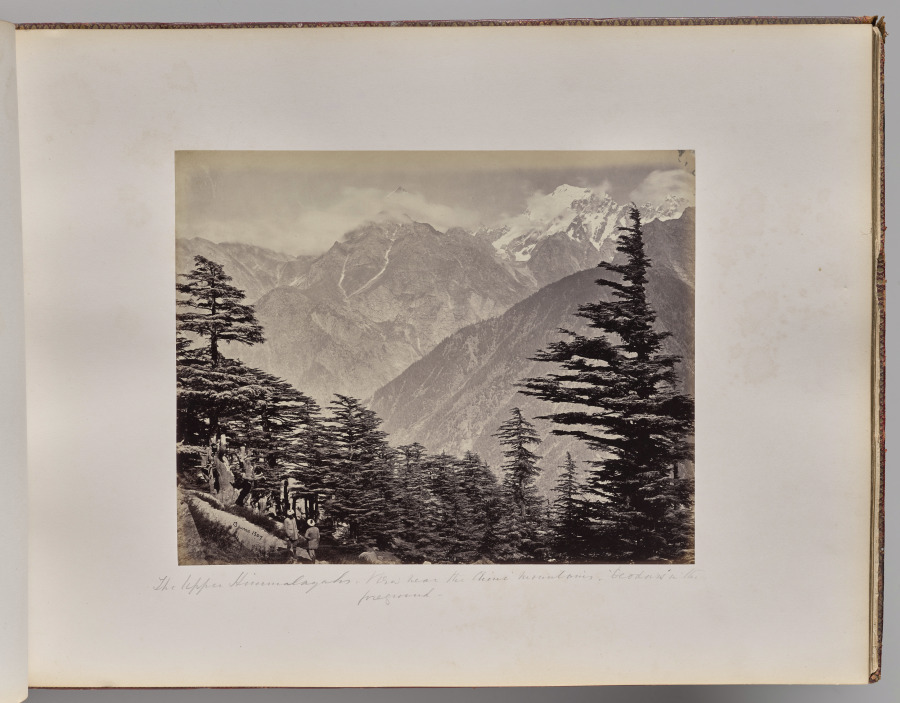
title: The Upper Himmalayahs. View Near China Mountains. Deoders in the Foreground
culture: England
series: Photographs of Northern India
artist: Samuel Bourne (British, 1834–1912)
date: 1863–70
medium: albumen print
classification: Photograph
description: The 50 images in this album, all taken in the 1860s, move from the hill towns of the Himalayas down to cities including Lahore (now in Pakistan), Delhi, Lucknow, Agra, Benares (now Varansi), and Calcutta (now Kolkata). Architectural studies of major monuments offer valuable historical records of what sites such as the Taj Mahal and the imperial mosque of the Mughal emperors in Delhi looked like before 20th-century restorations.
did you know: Samuel Bourne, the author of most the images in this album, was a banker in England before he moved to India to become a professional photographer.